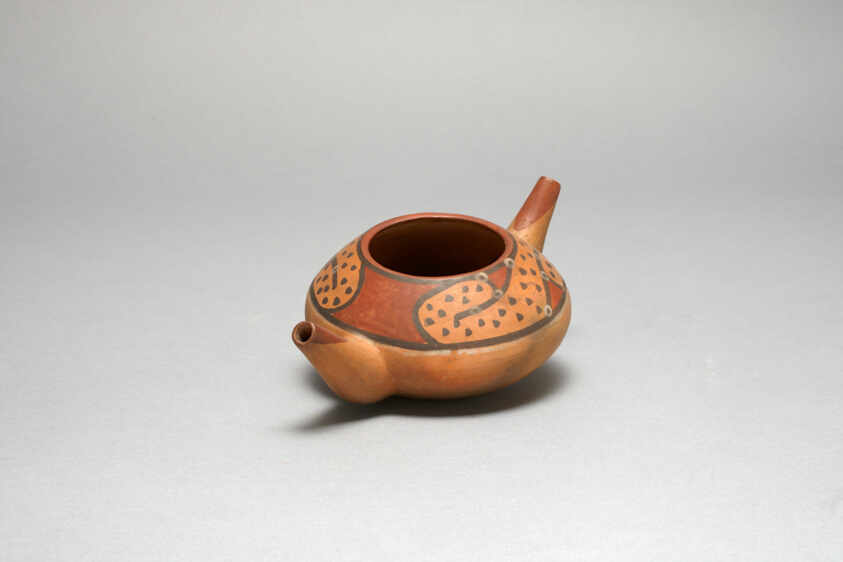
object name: Vessel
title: Small Double Spout Bowl with Repeated Curving Motif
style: lima, Arts of the Americas, south american, peruvian, maranga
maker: Possibly Lima or Maranga; Central coast, Peru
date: c. 500–700 CE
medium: Ceramic and pigment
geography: Peruvian Central Coast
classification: bowl; earthenware; ceramics; vessel; art of the americas